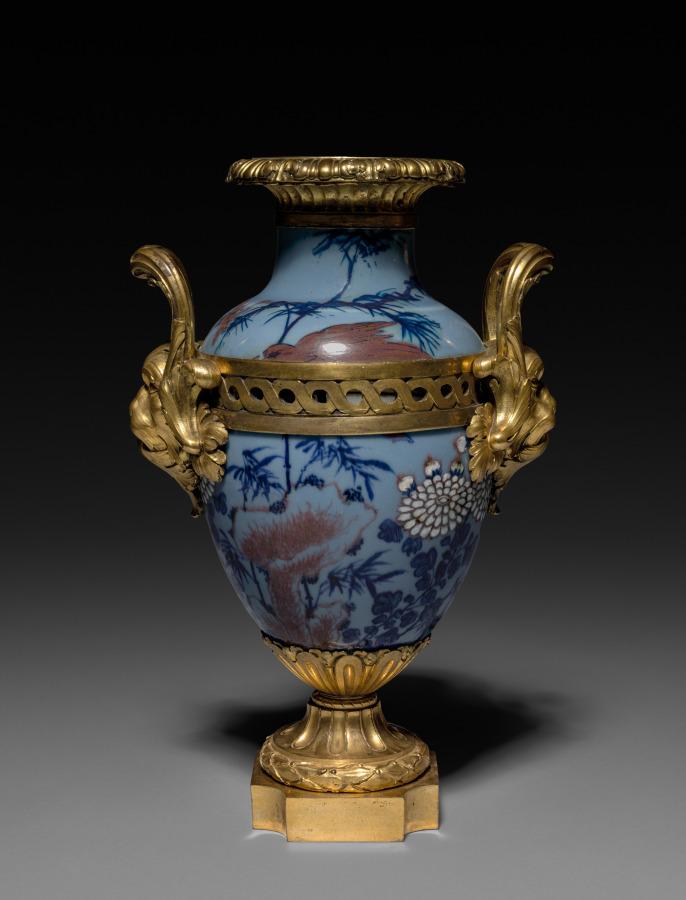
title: Garniture Set (one clock and 2 vases)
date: 1736–1770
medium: Chinese hard-paste porcelain, gilt bronze, enameled metal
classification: Furniture and woodwork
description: The fascination with Chinese porcelain among aristocratic circles increased during the reign of Louis XV. In reaction to the perceived excesses of elaborate naturalistic ornament of the 1750s, mount makers increasingly turned to neoclassical designs, known as Goût Grec (Greek taste) in the 1760s and 1770s. These beautifully chased gilt-bronze mounts feature classical Greco-Roman motifs such as lion masks, acanthus and laurel leaves, and pilasters.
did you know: A set of vases and clock, connected visually by the use of the same materials, often adorned a mantlepiece or the top of a large piece of furniture, such as a commode or console, within a room.